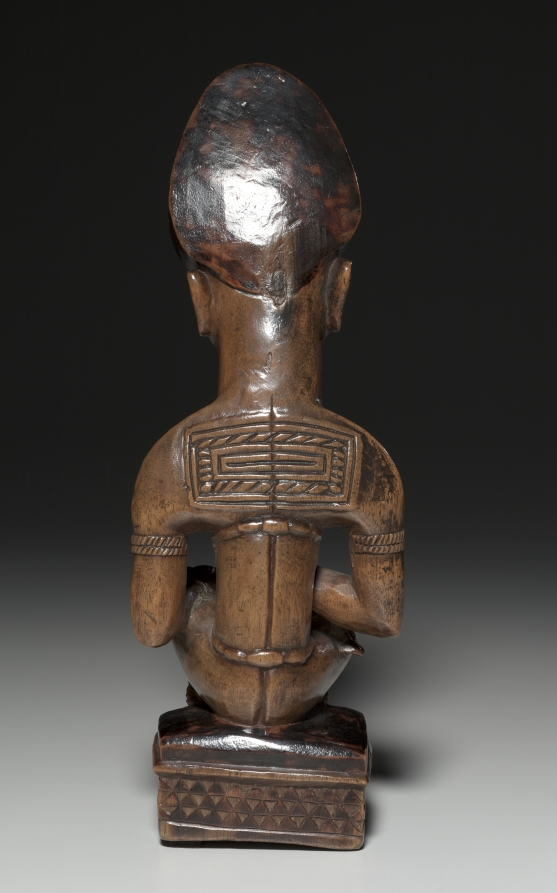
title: Woman and Child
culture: Africa, Central Africa, Democratic Republic of Congo, Yombe-style carver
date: mid- to late 1800s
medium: Wood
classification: Sculpture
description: This mother-and-child figure was probably part of a cult concerned with the treatment of infertility. Both her jewelry and her seated pose indicate that the woman occupied a high rank in her community. Her miter-shaped hairstyle, chiseled teeth, and raised body scars--considered to be marks of beauty and perfection--signal that the woman incarnates the founding ancestor of a kinship group.